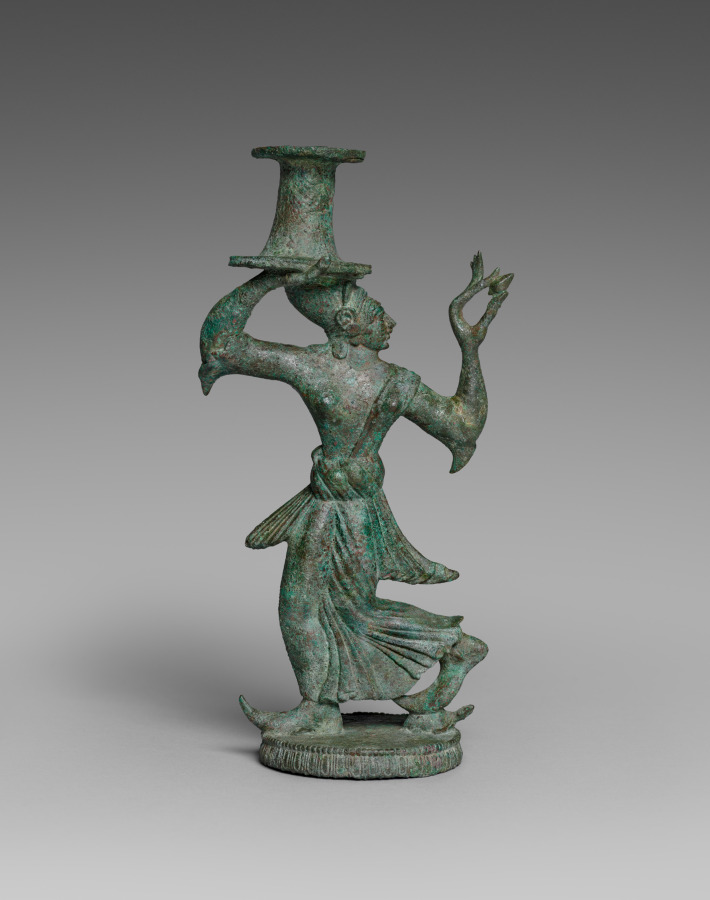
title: Candelabrum Stand of a Dancing Maenad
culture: Etruscan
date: 525–500 BCE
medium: bronze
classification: Sculpture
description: Conceived primarily in two dimensions—front and rear silhouette—this small bronze dancer probably once belonged to an elaborate candelabra or incense burner. The exaggeratedly long fingers and pointed shoes characterize the work as Etruscan, as do the stylized folds of the figure’s dress, which add visual interest but not verisimilitude. While her right hand holds above her head a cylindrical support, her left squeezes a small object, perhaps a fruit or clapper.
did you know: A small turtle beneath the figure’s back foot suggests a rustic setting.